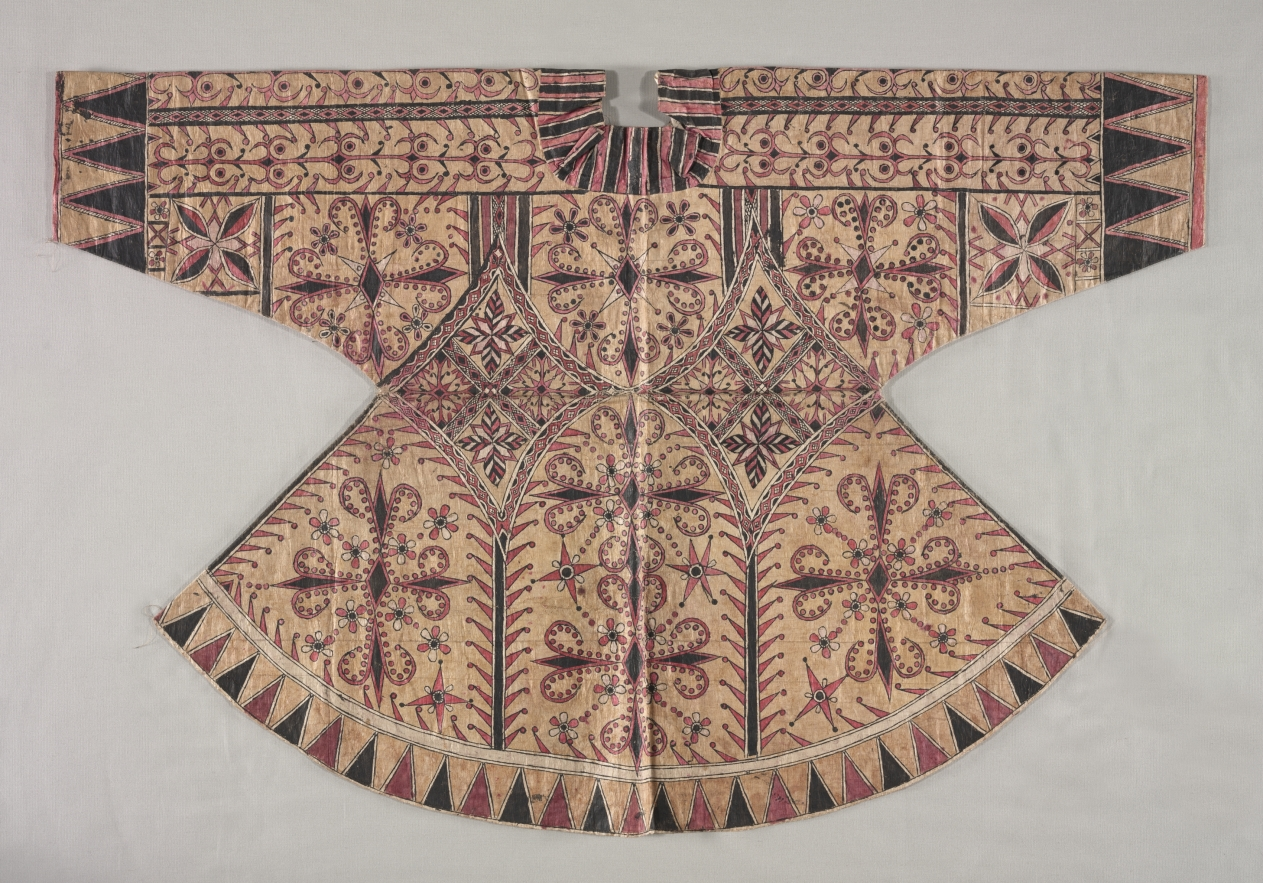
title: Jacket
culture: Indonesia, Sulawesi (Celebes), 19th century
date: 19th century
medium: tapa cloth, printed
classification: Garment